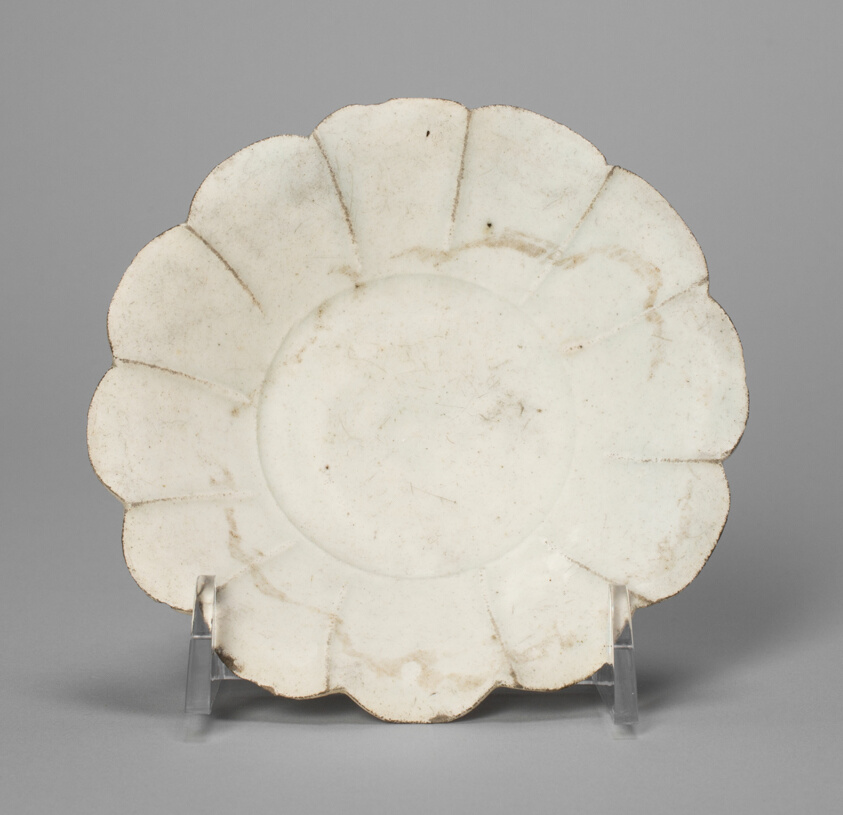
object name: Vessel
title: Saucer-Shaped Dish with Fluted Rim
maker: China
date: Song dynasty (960–1279)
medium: Ding ware; stoneware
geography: China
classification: ceramics; asian art